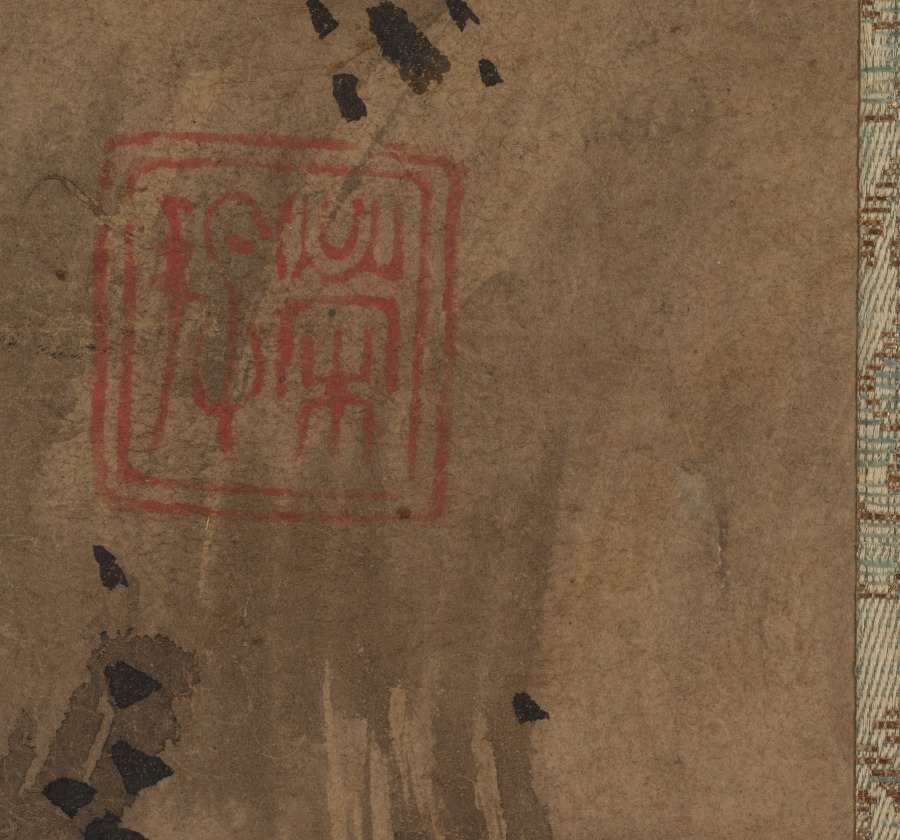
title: Wagtails and Narcissus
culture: Japan, Muromachi period (1392–1573)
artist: Eison (Japanese)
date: mid-1500s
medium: hanging scroll; ink on paper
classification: Painting